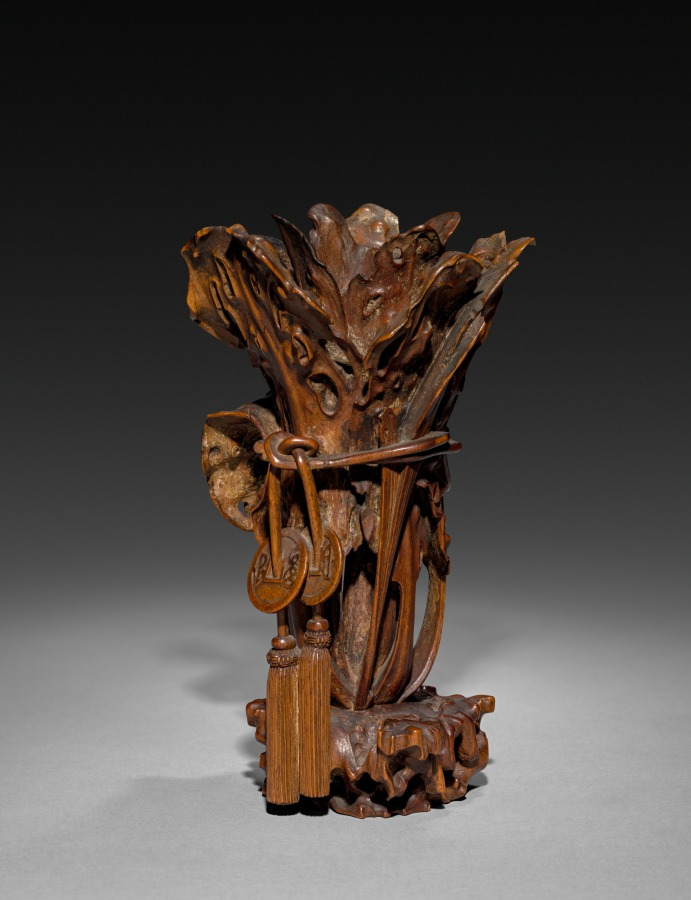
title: Cabbage and Beetle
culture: China, Qing dynasty (1644–1911), Qianlong reign (1736–95) or earlier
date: mid-1700s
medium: carved wood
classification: Wood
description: In the Qing dynasty (1644–1911), luxury items became more affordable to larger parts of the society, including women, merchants, and literati in non-official positions. Imperial patronage and a growing urban population encouraged consumption of luxury goods and local craftmanship. A superbly skilled carver created this small decorative object, reflecting scholarly taste of the period. This cabbage on a gnarled rock was carved from single piece of wood. There are openings between the stems, holes in leaves, and the rock it rests on. A beetle perches on one leaf which curves over the binding cord. The beetle was painted dark brown, while the cabbage and rock were finished overall with lighter tone.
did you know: Cord binds the cabbage loosely at the middle and goes through carved coins before ending in tassels.